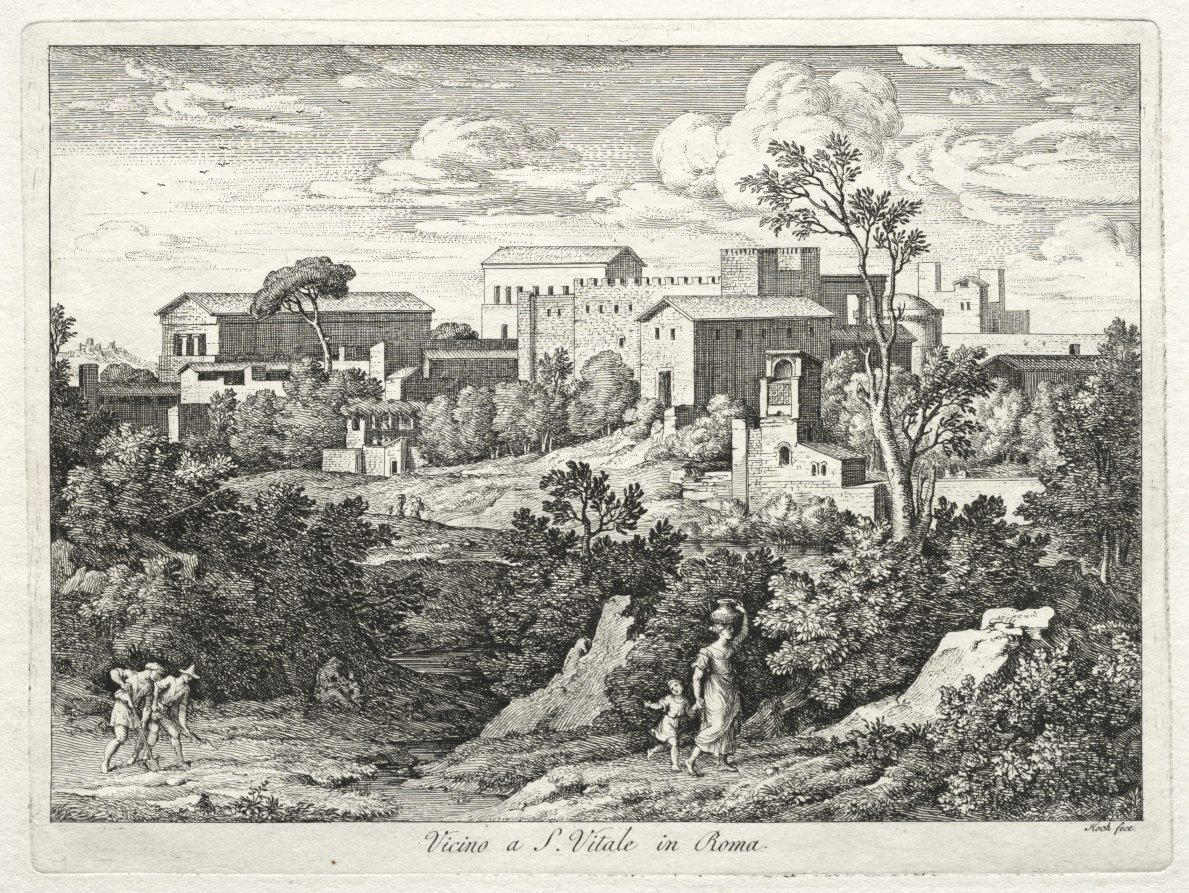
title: View of San Vitale, Rome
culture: Austria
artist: Joseph Anton Koch (Austrian, 1768–1839)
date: c. 1810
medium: etching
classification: Print